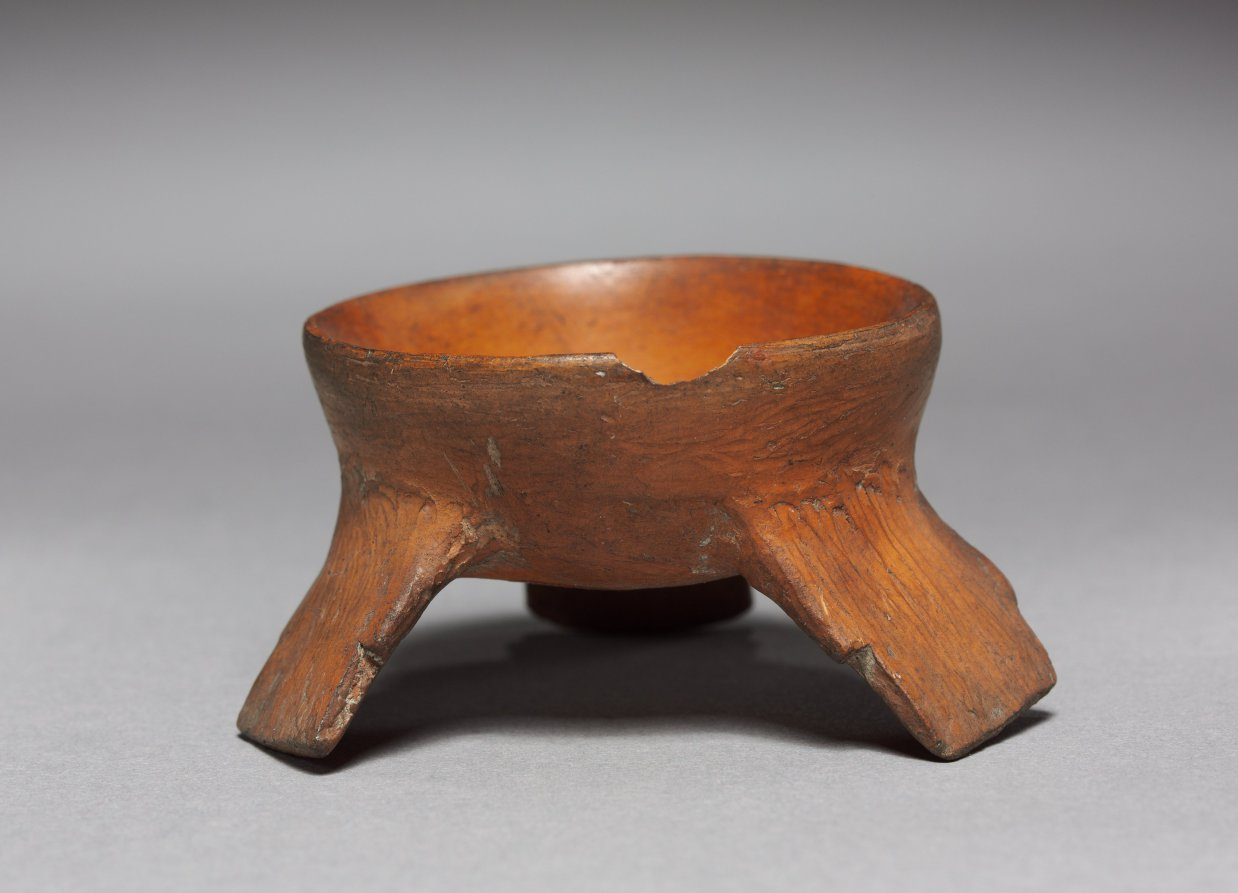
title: Tripod Dish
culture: Mexico, Aztec, 14th-16th century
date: 1325–1521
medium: terracotta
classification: Ceramic